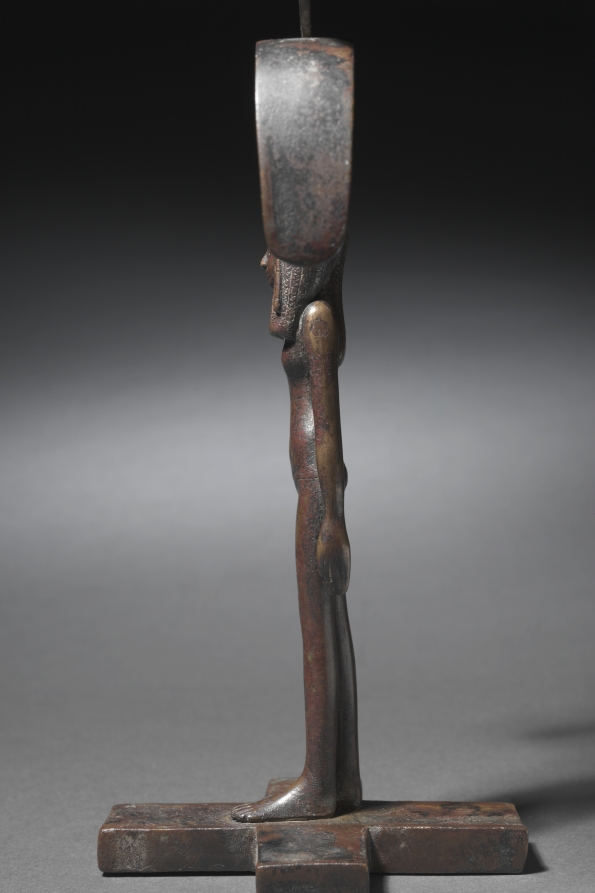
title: Caryatid Mirror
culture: Egypt, New Kingdom (1540–1069 BCE), Dynasty 18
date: c. 1540–1296 BCE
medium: bronze with black copper inlay?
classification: Cosmetic Objects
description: This superb mirror has an oval disk and a handle in the form of a nubile young girl, entirely naked except for her elaborately braided tripartite wig, broad collar, and a girdle of wallet beads. She stands on a cruciform base, with her left foot slightly advanced and her hands at her sides. On her head and supporting the disk is a papyrus umbel with flaring tips. Mirrors with handles in the form of naked young girls were the height of fashion in mid-Dynasty 18; numerous examples exist. This mirror is perhaps the finest of its kind. The cruciform base is unusual, if not unique. The iconography is understandable in relation to the goddess Hathor, the embodiment of love and beauty. A multifaceted goddess, she was equated with Aphrodite by the Greeks. The retinue of Hathor consisted precisely of such beauties, called nefrut in Egyptian, and the mirror itself, that reflection of beauty, appears to have had Hathorian connections from early times.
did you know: When they were made, this mirror was polished to a brilliant shine; the marvelous colored patina it has since acquired is the result of being buried for years in the ground.